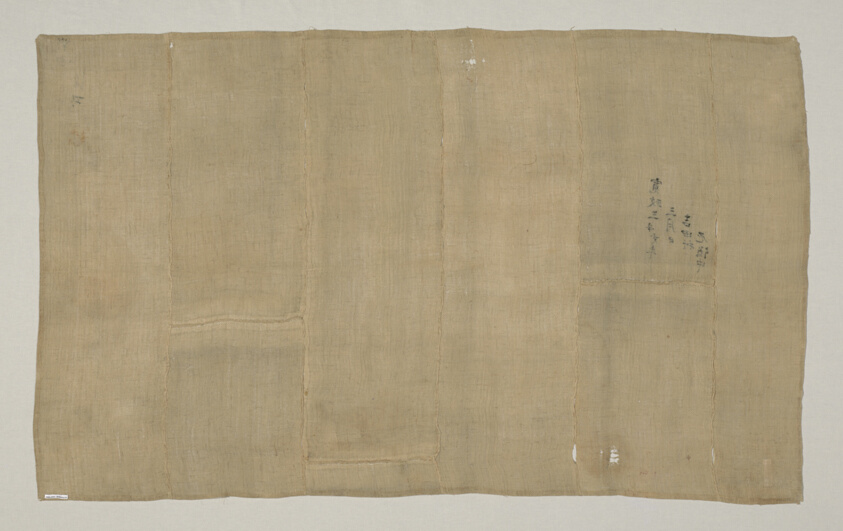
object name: Textile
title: Interling (From a Kesa)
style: late edo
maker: Japan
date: late Edo period (1789–1868), 1792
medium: Hemp, plain weave; inscribed with Indian ink (sumi)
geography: Japan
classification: textile; weaving; liturgical - buddhist